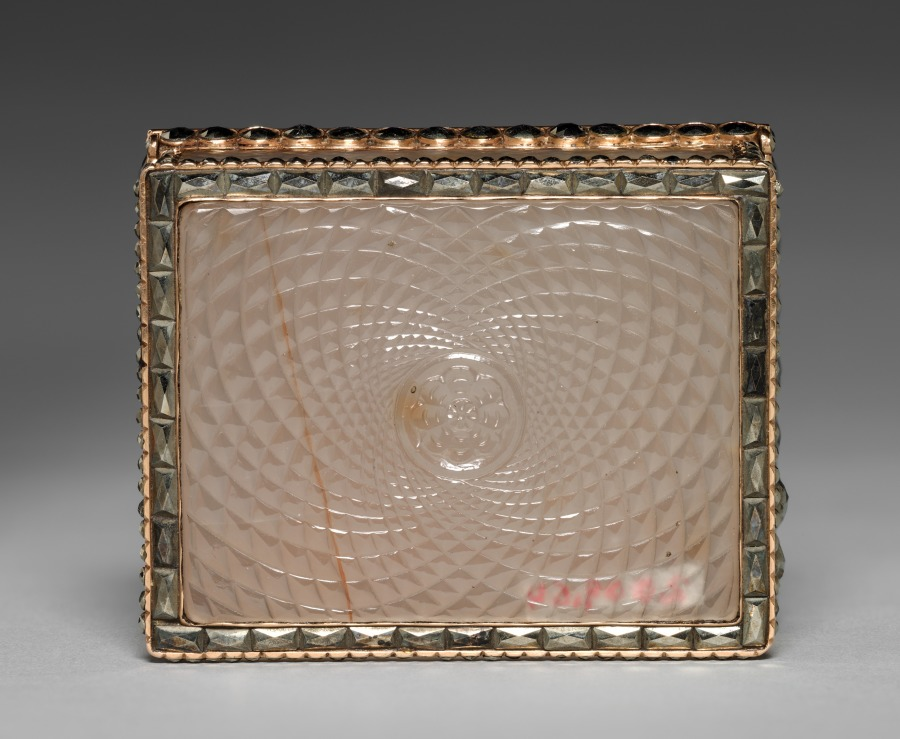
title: Snuff Box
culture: England, London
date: c. 1750–60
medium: gold-mounted agate, engine-turned panels, hematites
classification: Miscellaneous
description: Luxurious personal objects, like this snuff box, were an essential part of a privileged wardrobe during the 1700s and early 1800s, emphasizing their owner’s refinement and wealth. Their glittering surfaces, however, disguised a system based on the labor and suffering of enslaved or indentured people, whether in gold or gemstone mines, tobacco farms, or shops where these goods were made. Like cotton, sugar, and tea, snuff came from British colonies in America, India, and the Caribbean, where enslaved people were exploited to grow these crops under extremely harsh conditions.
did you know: This small, elaborate box held snuff, a form of powdered tobacco that was inhaled in tiny amounts.